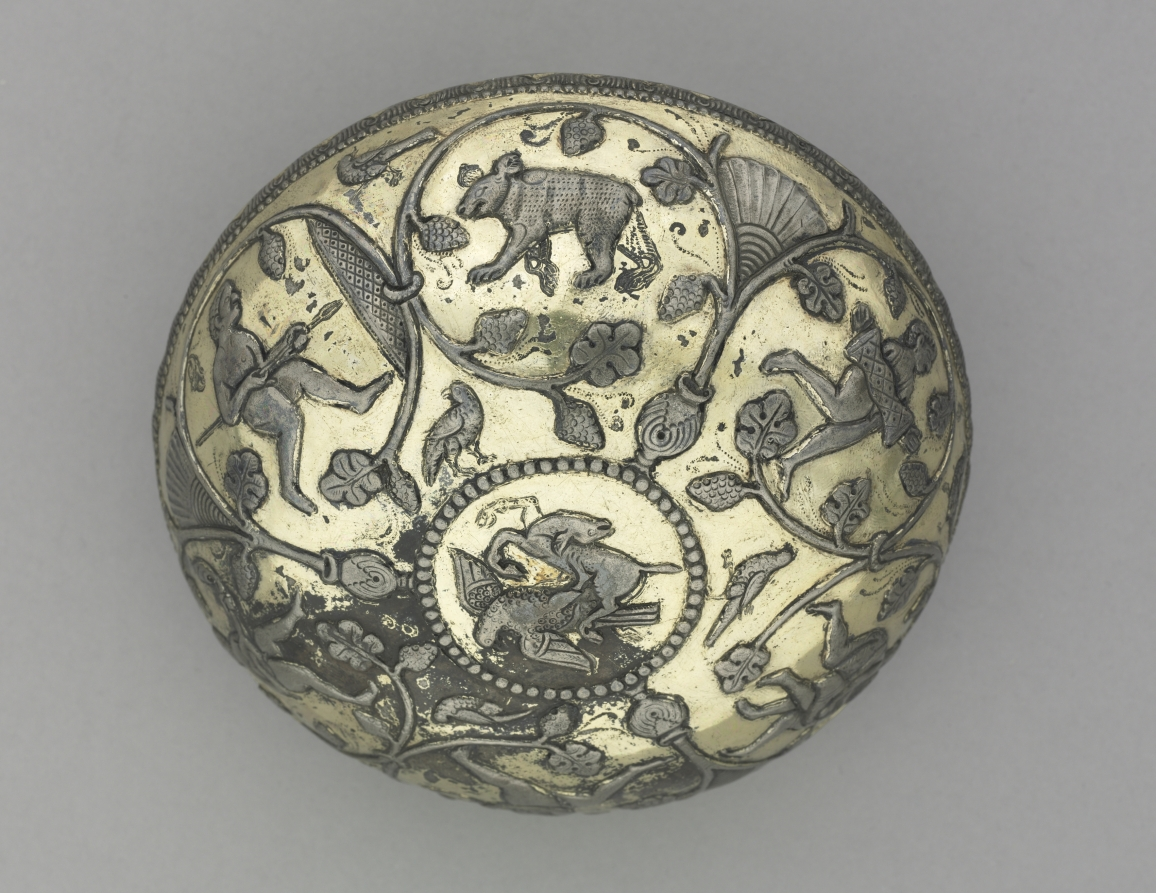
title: Bowl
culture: Iran, Sasanian Empire (224–651 CE)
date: 500–700 CE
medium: silver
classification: Metalwork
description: Every good Zoroastrian was supposed to spend one-third of his day farming; one-third philosophizing; and one-third eating, resting, and at pleasure. The abundance of Sasanian luxury goods is evidence of the importance accorded the last third of the day.